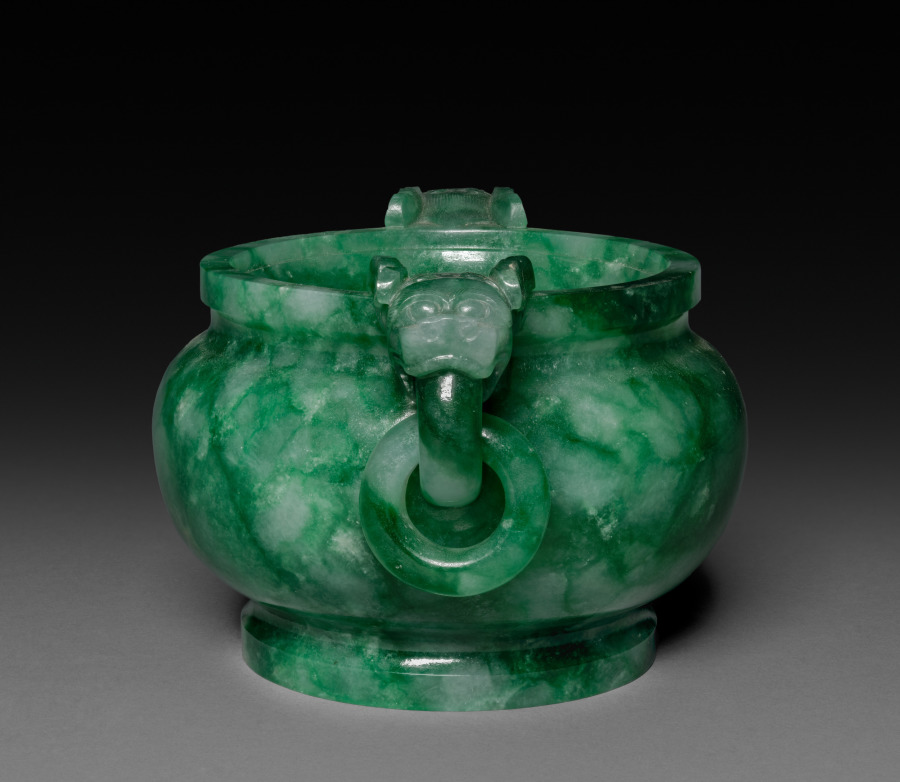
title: Incense Burner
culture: China, Qing dynasty (1644–1911), Qianlong reign (1736–95)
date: 1736–95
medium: green jade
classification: Jade